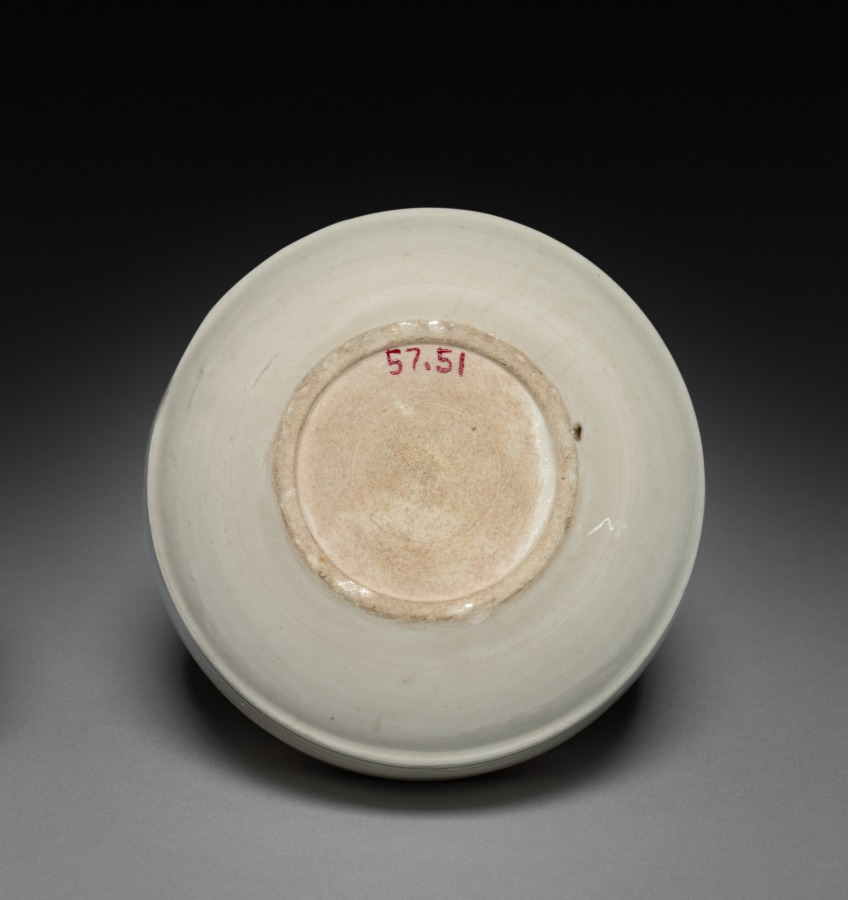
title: Covered Box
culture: China, Hebei province, Quyang, Northern Song dynasty (960–1127)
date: 1000s–1100s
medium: white porcelain, Ding ware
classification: Ceramic